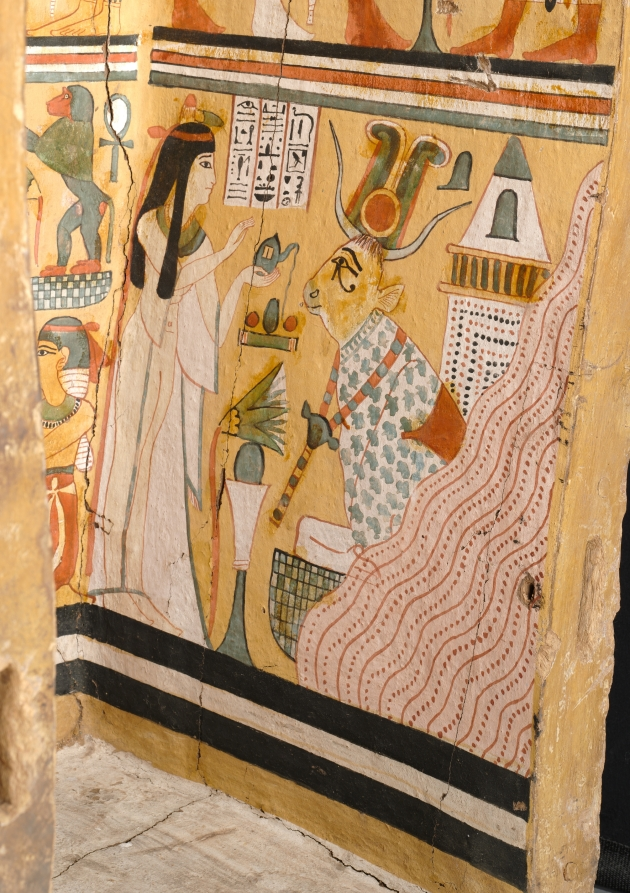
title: Coffin of Nesykhonsu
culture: Egypt, Thebes, Third Intermediate (1069–715 BCE), Dynasties 21–22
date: c. 976–889 BCE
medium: gessoed and painted sycamore fig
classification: Funerary Equipment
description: Egyptian coffins told stories and illustrated spells to help the deceased transition safely to the afterlife. Inside Nesykhonsu's coffin there are two jackals, one facing right and the other left, near the top. Here, the jackal represents the powerful deity Anubis, the god of the afterlife and embalming.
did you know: Two of Nesykhonsu's titles, "Lady of the House" and "Singer of the Choir of Mut the Great," are written on the outside of the coffin.